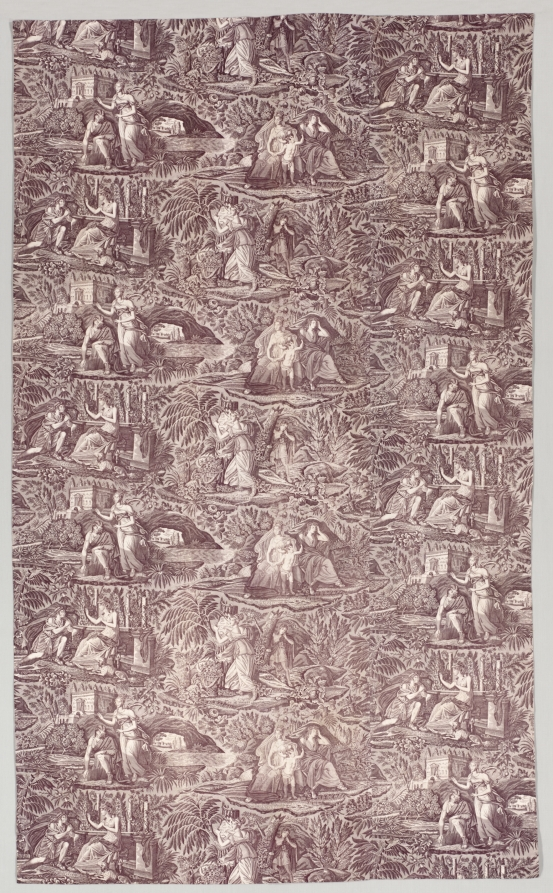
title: Amorous Scenes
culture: France, Nantes or Rouen ?, early 19th century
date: early 1800s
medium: copperplate printed cotton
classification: Textile